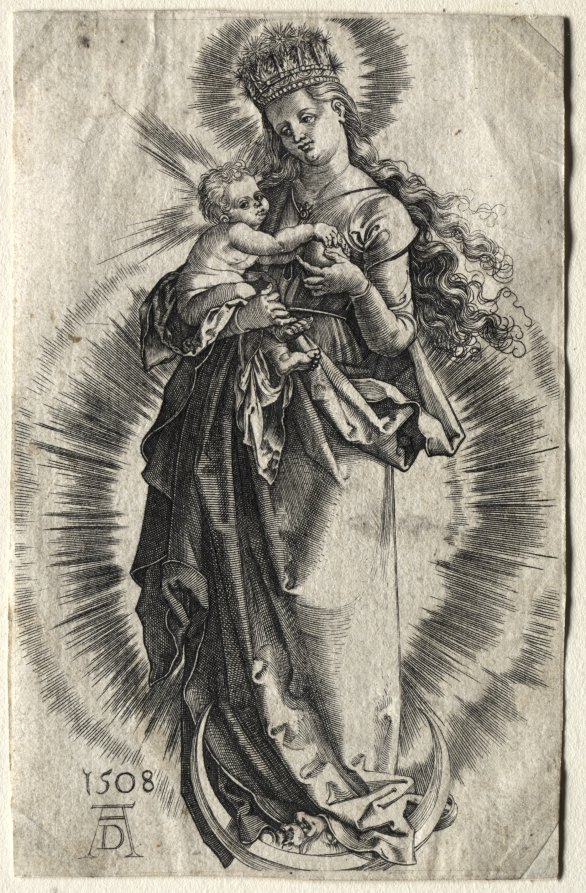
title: Virgin on a Crescent with a Starry Crown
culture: Germany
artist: copy after Albrecht Dürer (German, 1471–1528)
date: 1500s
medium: engraving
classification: Print